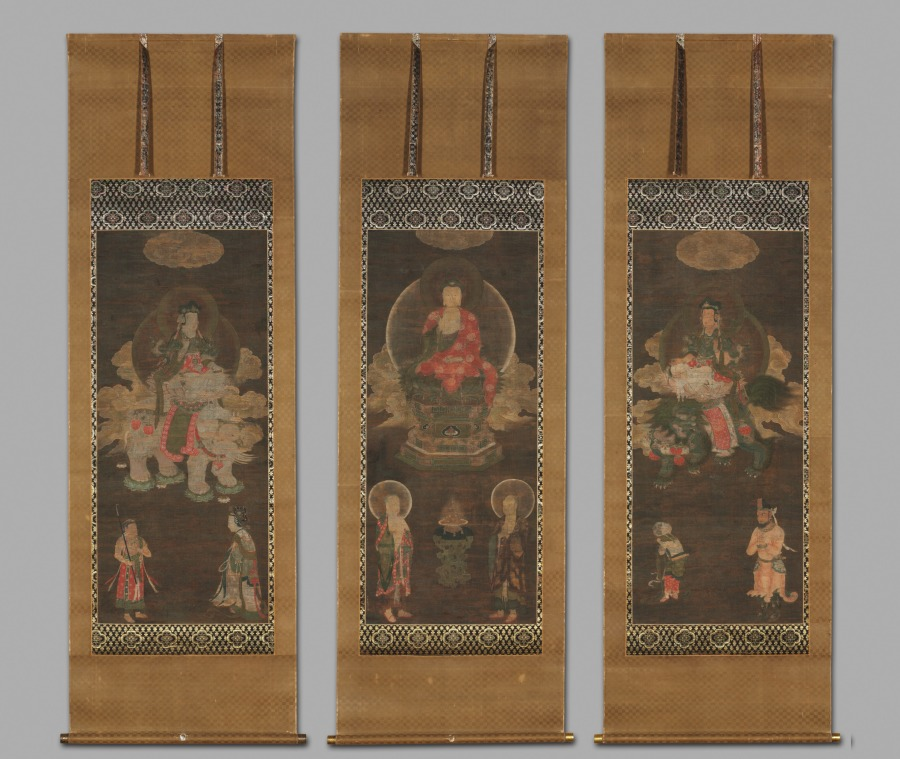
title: Shakyamuni Triad: Buddha Attended by Manjushri and Samantabhadra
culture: China, Fuzhou, Fujian Province, Yuan dynasty (1271-1368)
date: late 1300s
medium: Set of three hanging scrolls; ink and color on silk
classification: Painting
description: This triptych is a rare example of Yuan Buddhist painting. It depicts the historic Buddha Shakyamuni flanked by two attending bodhisattvas, Manjushri (the bodhisattva of wisdom, riding a lion) and Samantabhadra (the bodhisattva of universal virtue, riding an elephant). Below them are others seeking enlightenment: two disciples of the Buddha (Ananada and Kasyapa), two non-Chinese people, a boy with topknots, and a female worshiper. The clouds above and around the divine beings form one scene that illustrates Shakyamuni’s sermon from the Lotus Sutra. This text became an important basis for Buddhist faith throughout East Asia and was central to the Mahayana school of Buddhism.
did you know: This triptych is based on the Lotus Sutra, a Buddhist scripture that welcomes female worshippers.